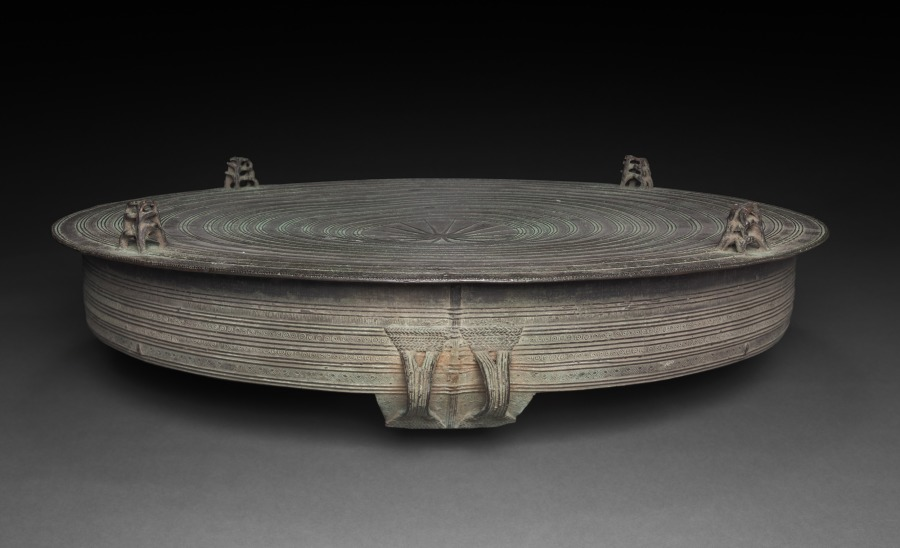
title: Dongson Drum Top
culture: Southeast Asia, Thailand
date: 300–400 CE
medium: bronze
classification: Metalwork